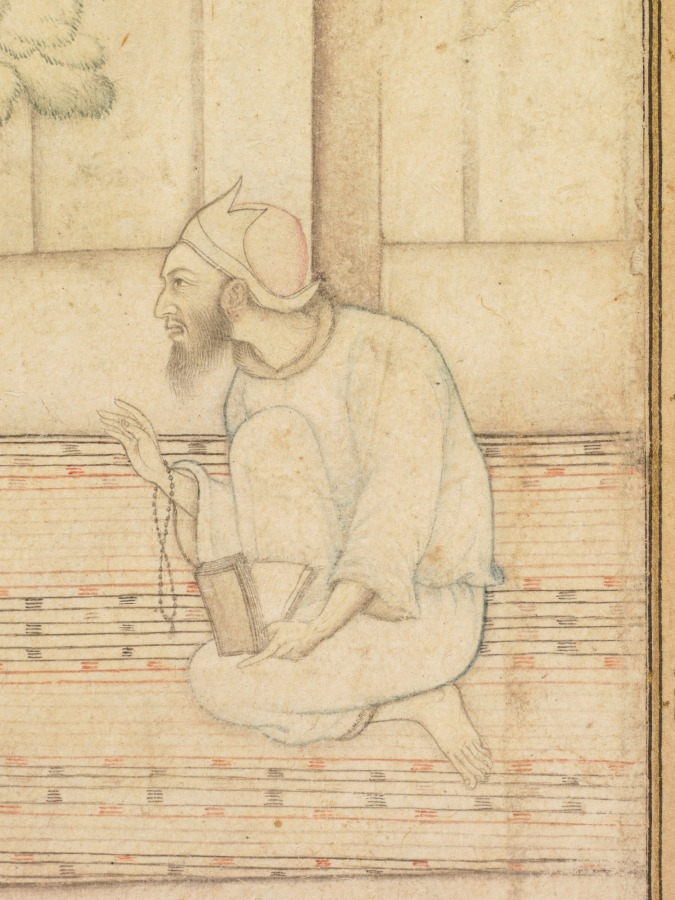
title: Kabir and Two Followers on a Terrace (recto)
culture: India, Mughal, 17th century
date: c. 1610–1620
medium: Gum tempera, ink, and gold on paper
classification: Painting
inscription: verso: four lines of nast 'aliq calligraphy with illuminated panels, with illuminated panels, ink gold and opaque watercolor on paper